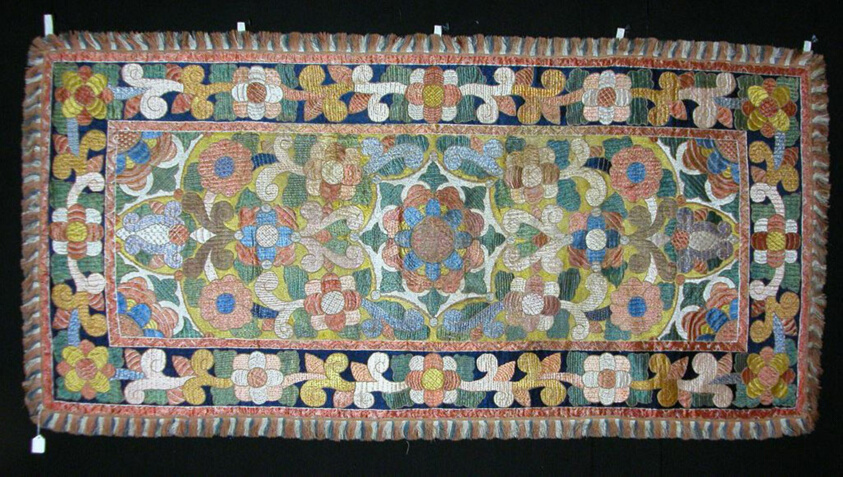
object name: Textile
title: Valance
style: qing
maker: China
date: Qing dynasty (1644–1911), c. 1700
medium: Cotton, plain weave; embroidered with silk and gold-leaf-over-lacquered-paper-strip-wrapped linen in laidwork and couching: edged with silk, plain weave with extended weft cut fringe; lined with silk and cotton, satin weave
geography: China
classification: textile; needlework (visual works); weaving